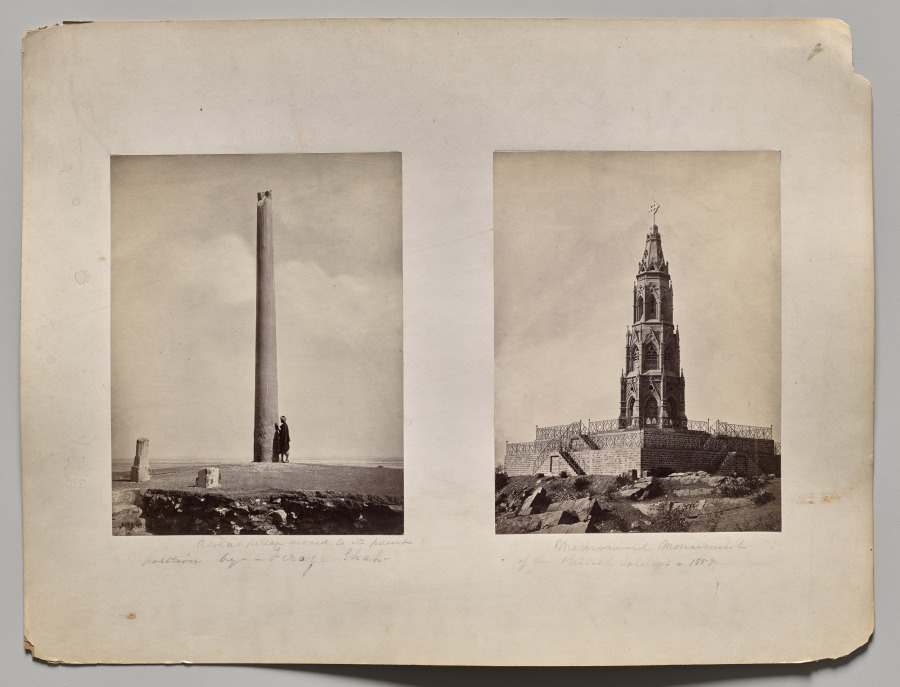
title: Memorial Monument of the British Soldiers in 1859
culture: England, 19th century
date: 1870s-1880s (?)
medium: albumen print mounted on an album page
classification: Photograph